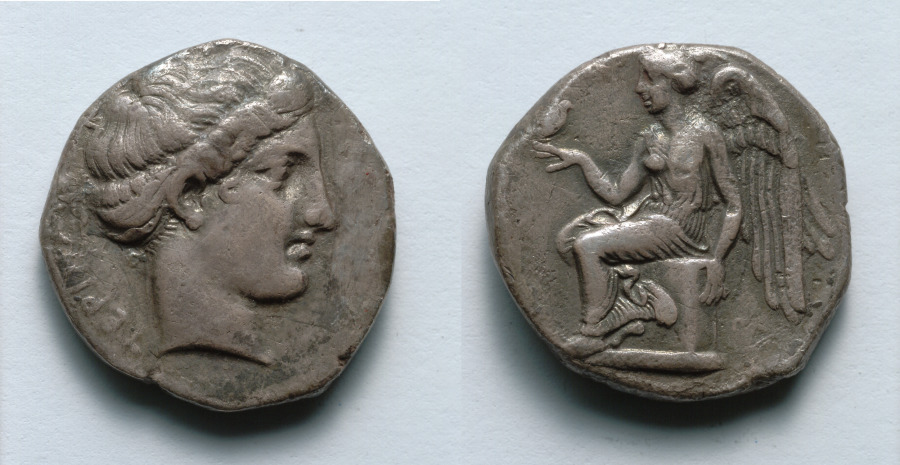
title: Stater: Head of Nymph (Obverse); Nike (Reverse)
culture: Greek, minted at Terina (South Italy)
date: c. 420–400 BCE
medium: silver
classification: Coins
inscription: ΤΕΡΙΝΑΟΝ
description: Coins from the South Italian colony of Terina are notable for their sophisticated reworkings of other cities’ designs. On the obverse of this tetradrachm is a female head with short, wavy hair, possibly modeled on the Syracusan nymph Arethousa. The reverse captures an intimate moment as Nike sits, tenderly holding a bird, much like young women in Athenian funerary sculptures.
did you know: Nike sits on a cippus, a pillar used as a boundary stone or grave marker.